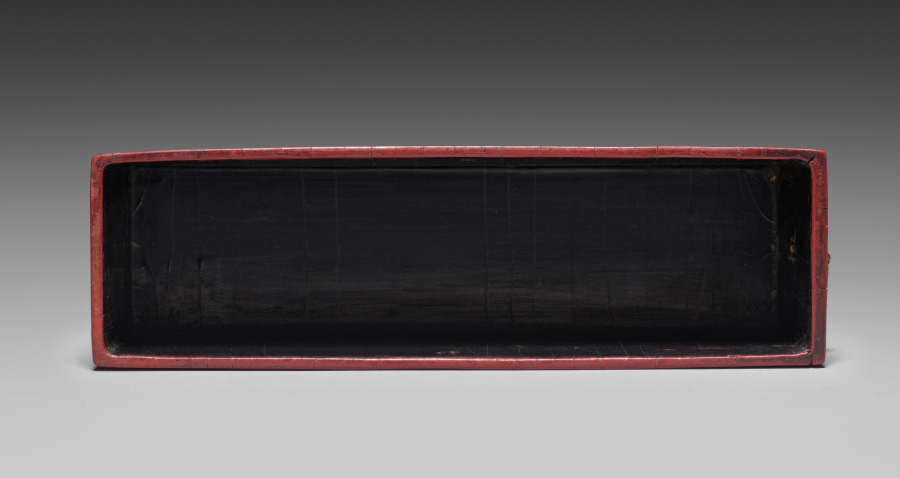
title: Drawer for a Tihong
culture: China, Ming dynasty (1368-1644), Wanli reign (1572-1620)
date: 1585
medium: carved cinnabar lacquer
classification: Lacquer